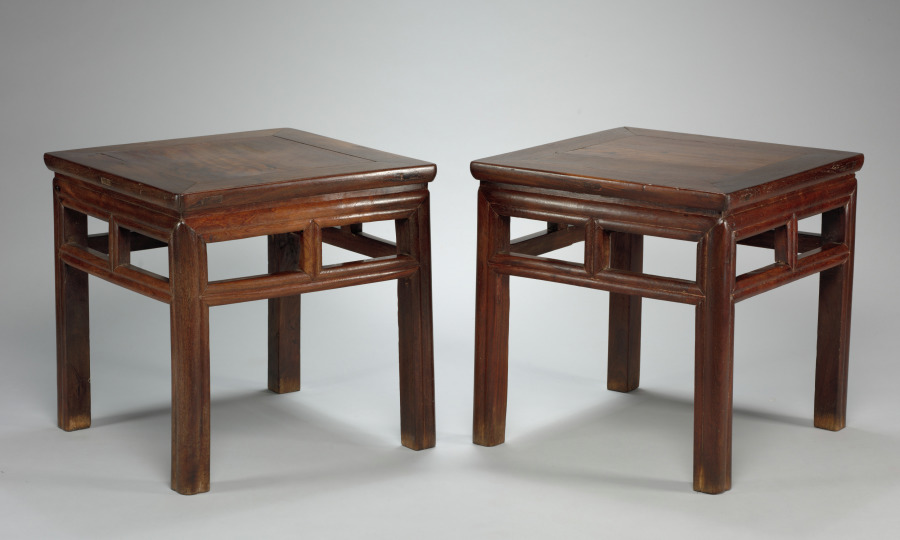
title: Pair of Stools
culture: China, Qing dynasty (1644-1911)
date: 1700–1725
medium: Chicken-wing wood (jichimu)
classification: Furniture and woodwork